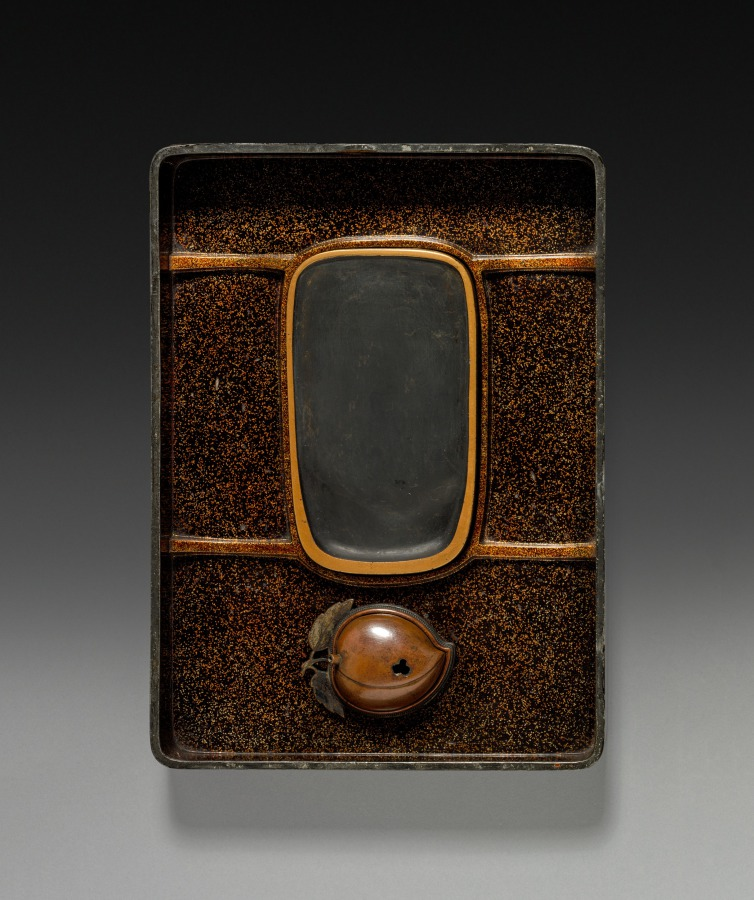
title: Inkstone Case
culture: Japan, Edo period (1615–1868)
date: 1800s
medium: lacquer on wood inlaid with mother-of-pearl, applied carved metal, and glazed ceramic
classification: Lacquer